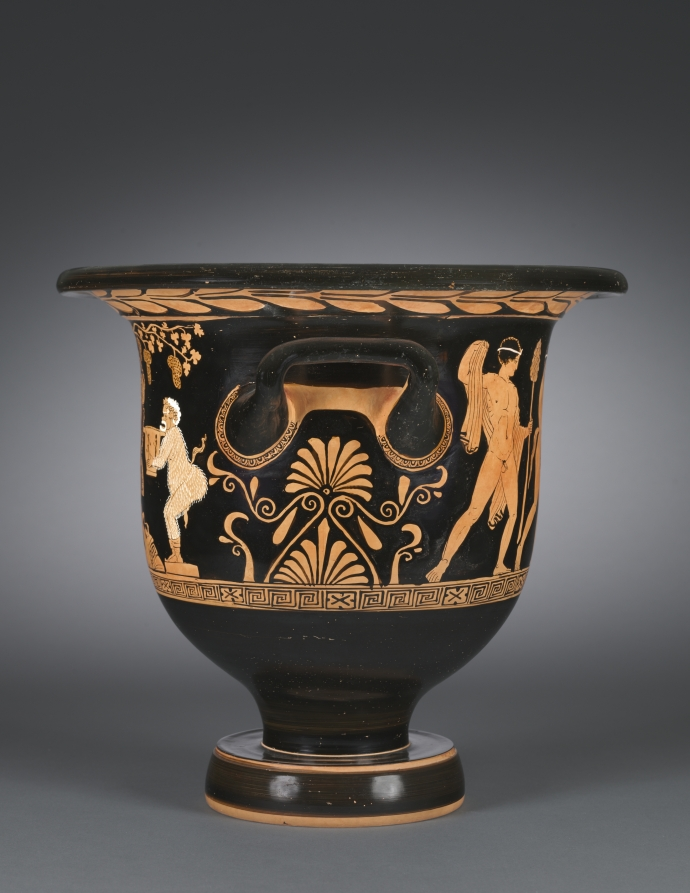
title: Red-Figure Bell-Krater (Mixing Vessel): Bust of Dionysos and Comic Actors (A); Dionysos, Satyr, Maenad (B)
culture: South Italian, Apulian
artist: attributed to Choregos Painter (South Italian, Apulian, active c. 390–380 BCE)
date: c. 390–380 BCE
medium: ceramic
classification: Ceramic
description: Dionysos, the god of wine, theater, and the mysteries, dominates both sides of this bell-krater, a vessel for mixing water and wine. On the front, he appears in bust form, wearing a fillet and laurel wreath. Over his shoulder and behind his head rests his thyrsos, sprouting grapevines. Comic actors, identifiable by their masks and padded costumes, flank the colossal bust, stretching for a bunch of grapes on the left and holding a large skyphos (wine cup) on the right. On the reverse, Dionysos marches in procession with his retinue, a satyr and maenad.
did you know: The large bust of Dionysos may represent a stage prop or symbolize the multifaceted god.